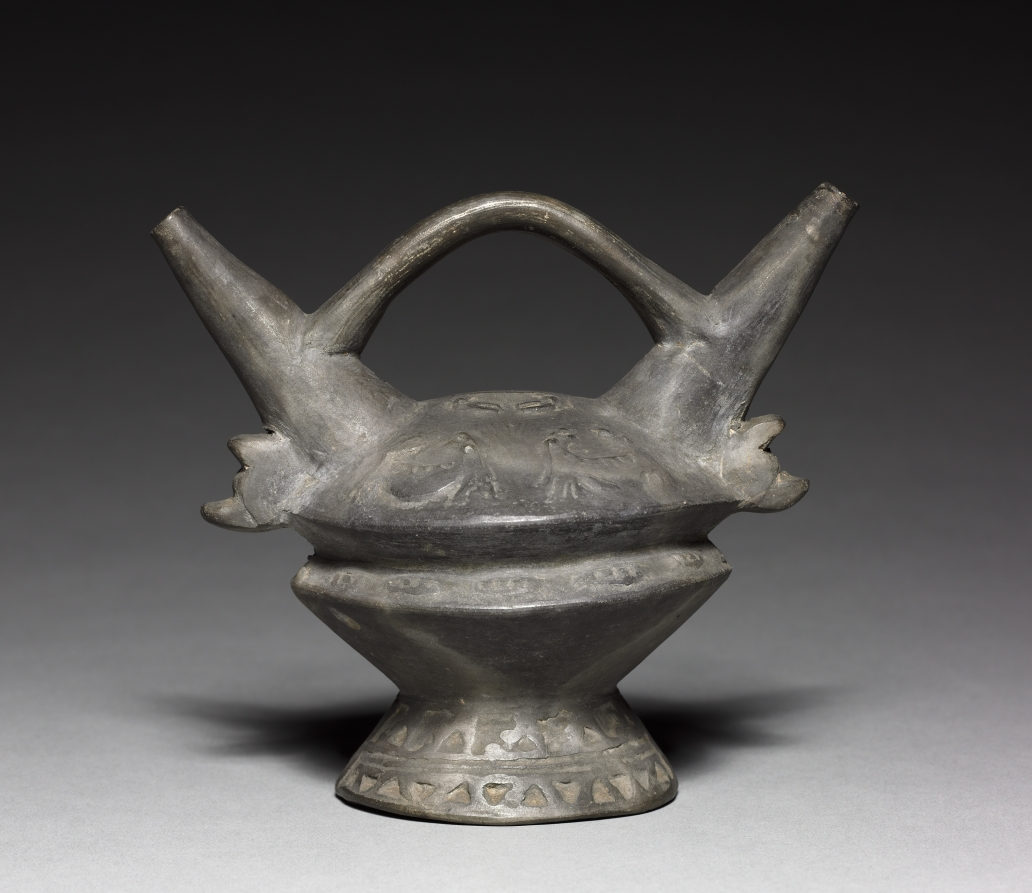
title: Vessel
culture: Peru, Chimú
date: 1300–1400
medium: black ware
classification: Ceramic